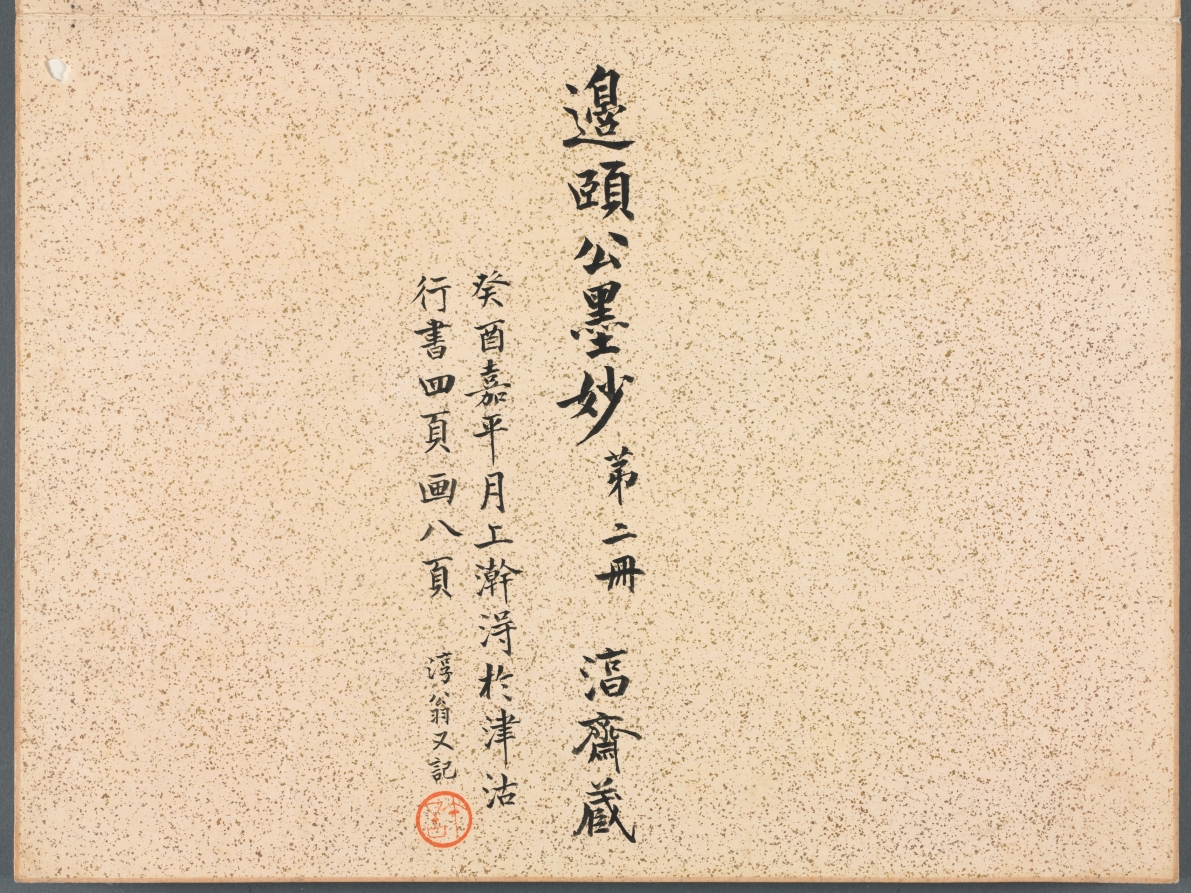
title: Album of Calligraphy and Paintings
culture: China, Qing dynasty (1644-1911)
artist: Bian Shoumin (Chinese, 1684–1752)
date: first half of the 1700s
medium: album leaf; ink and color on paper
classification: Painting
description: The artist Bian Shoumin is known for his depiction of wild geese, water, and reeds. The migrant birds in autumn and winter evoked, in the minds of the Chinese intelligentsia, a time of parting and sorrow.